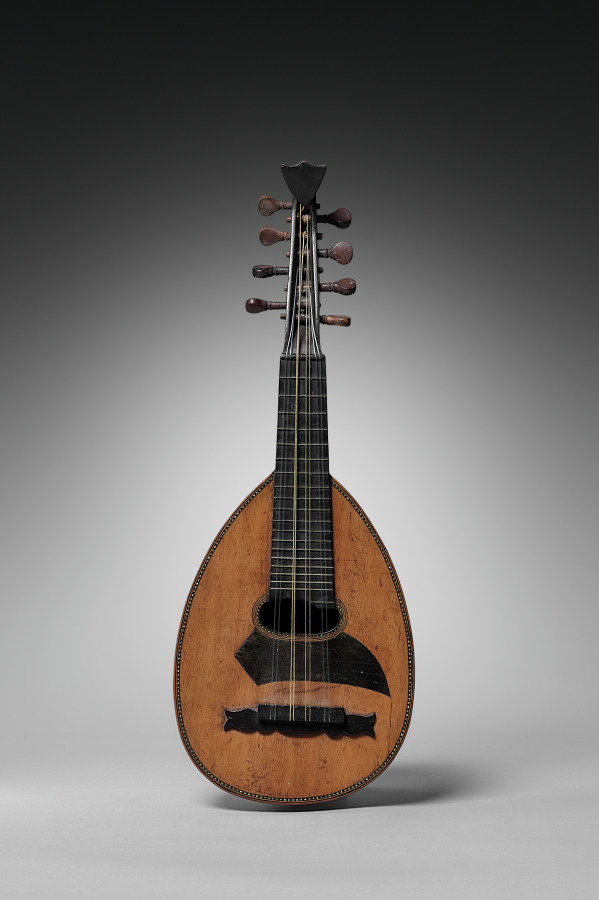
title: Mandore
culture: probably France, 19th century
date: c. 1800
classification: Musical Instrument